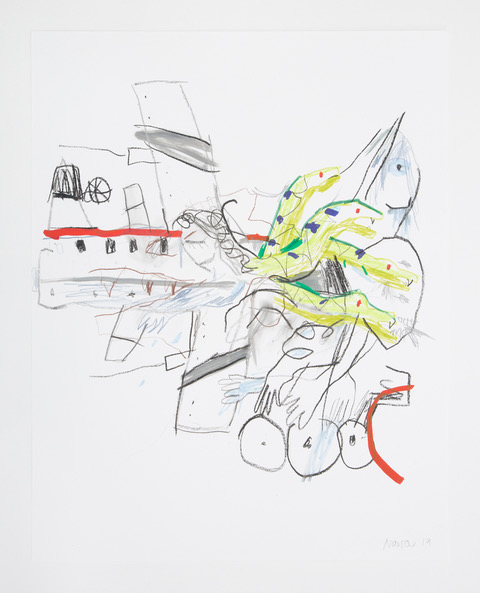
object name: Drawing and Watercolor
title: Sketches: Profile Heads, Coins or Medals (recto); Trees (verso)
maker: Henri Cros (French, 1840-1907)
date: c. 1885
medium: Watercolor and graphite on cream laid paper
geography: France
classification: watercolor; drawings (visual works); prints and drawing